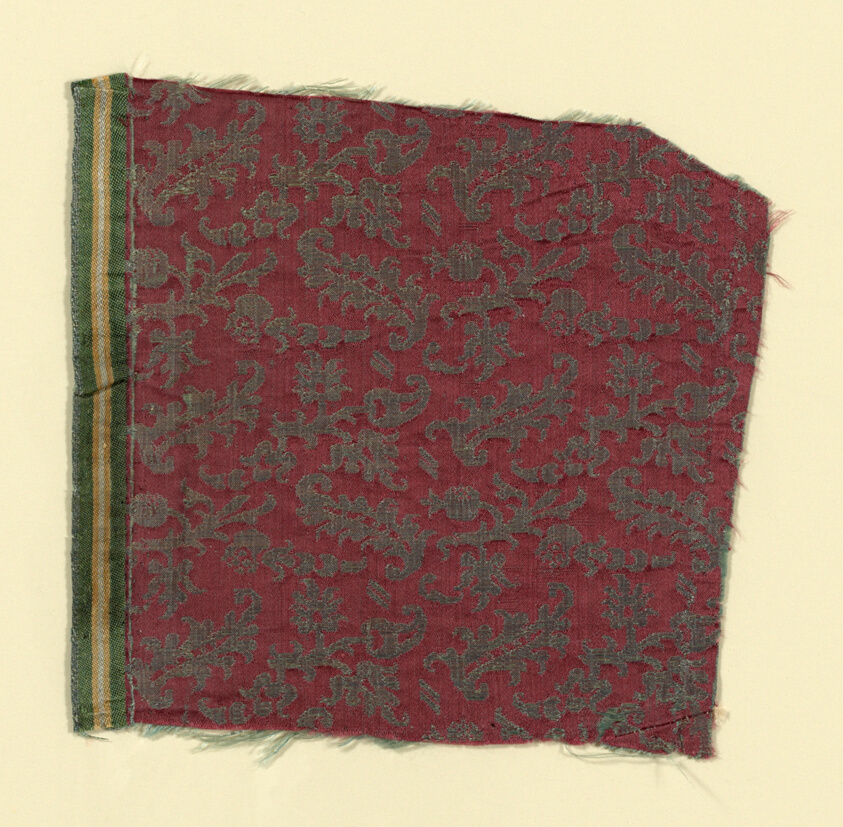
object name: Textile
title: Fragment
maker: Italy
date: 1601/50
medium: Silk, warp-float faced satin weave self-patterned by reversing of faces (satin damask)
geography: Italy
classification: textile; weaving